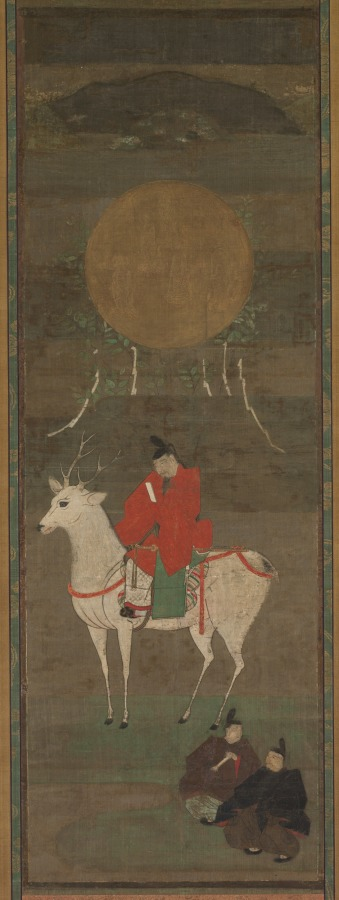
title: Departure from Kashima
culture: Japan, Nanbokuchō period (1336–92)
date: 1336–92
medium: hanging scroll; ink and color on silk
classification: Painting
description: The kami Takemikazuchi from Kashima (in present-day Ibaraki Prefecture) departs on a white deer for Mount Mikasa in Nara, where he takes up residence. The five Kasuga kami are presented within a golden circle supported by the branches of a sakaki tree, from which trail five white paper streamers—indicating the purity and sacredness of the five shrine halls of the complex—as well as blossoming wisteria vines, a symbol of the Fujiwara family. The two figures walking along near the stag’s back legs are Nakatomi no Tokifū and his younger brother Hidetsura, who have followed Takemikazuchi and become priests of Kasuga Taisha.